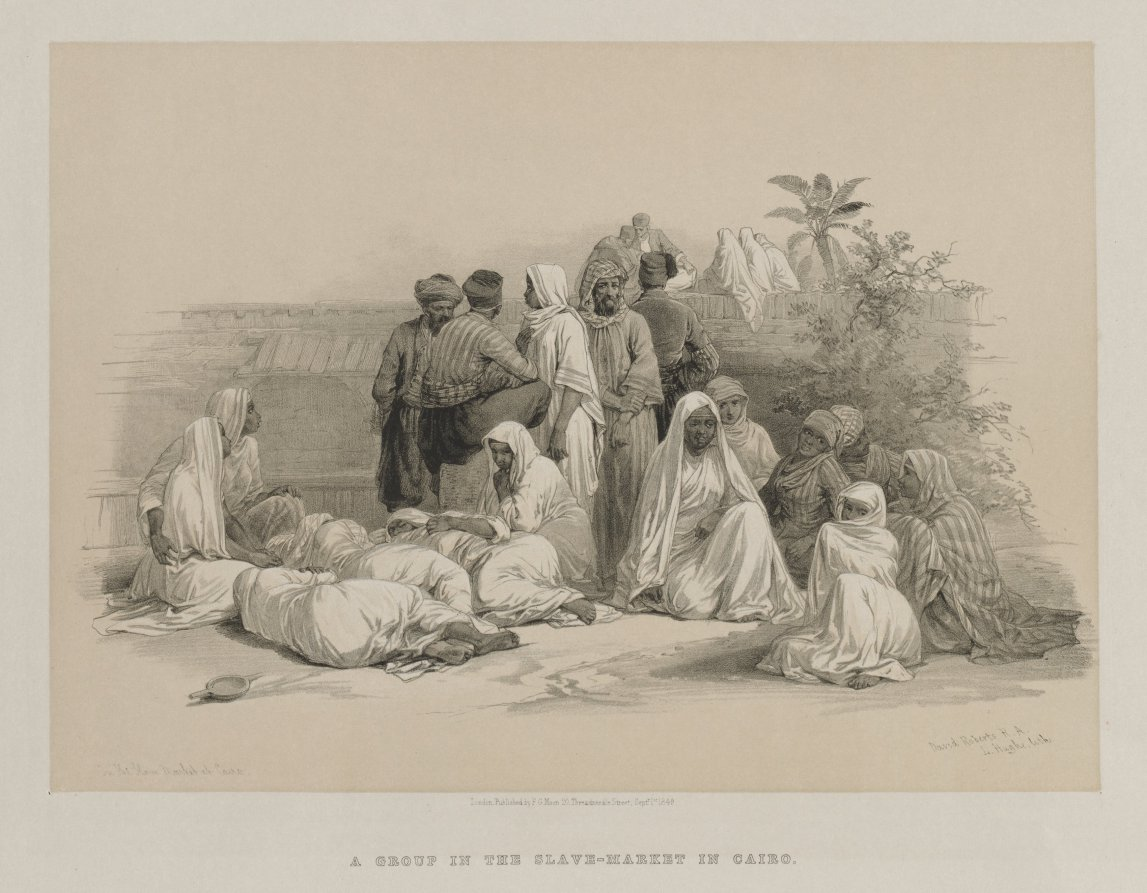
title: Egypt and Nubia, Volume III: In the Slave Market at Cairo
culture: England, 19th century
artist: Louis Haghe (British, 1806–1885)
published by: F. G. Moon, 20 Threadneedle Street, London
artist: after David Roberts (Scottish, 1796–1864)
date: 1849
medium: color lithograph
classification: Print